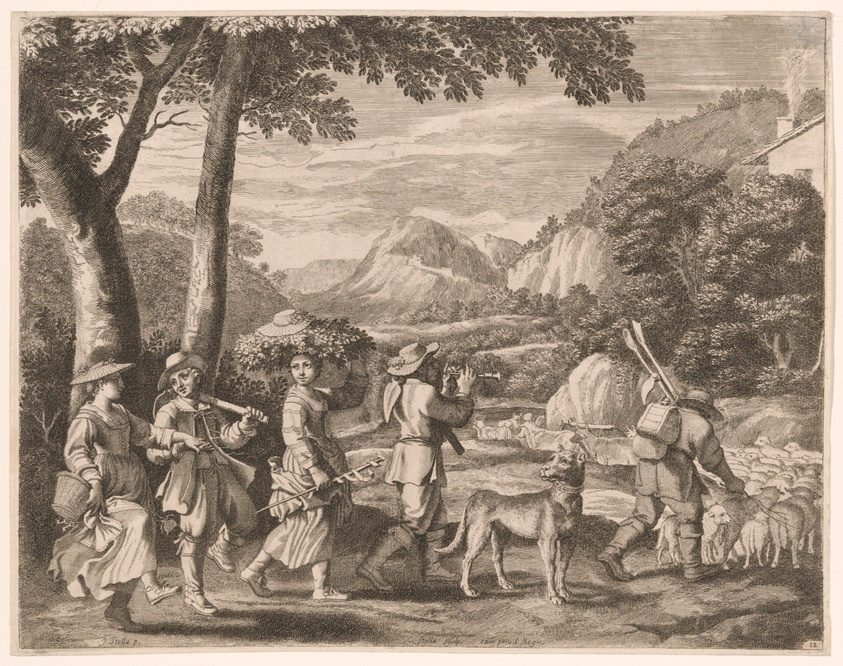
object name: Print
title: Returning from Work, Plate 12 from Pastorales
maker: Claudine Bouzonnet-Stella (French, 1636–1697); after Jacques Stella (French, 1596-1657)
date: 1667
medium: Etching in black on cream laid paper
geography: France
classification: prints and drawing; paper; etching; print